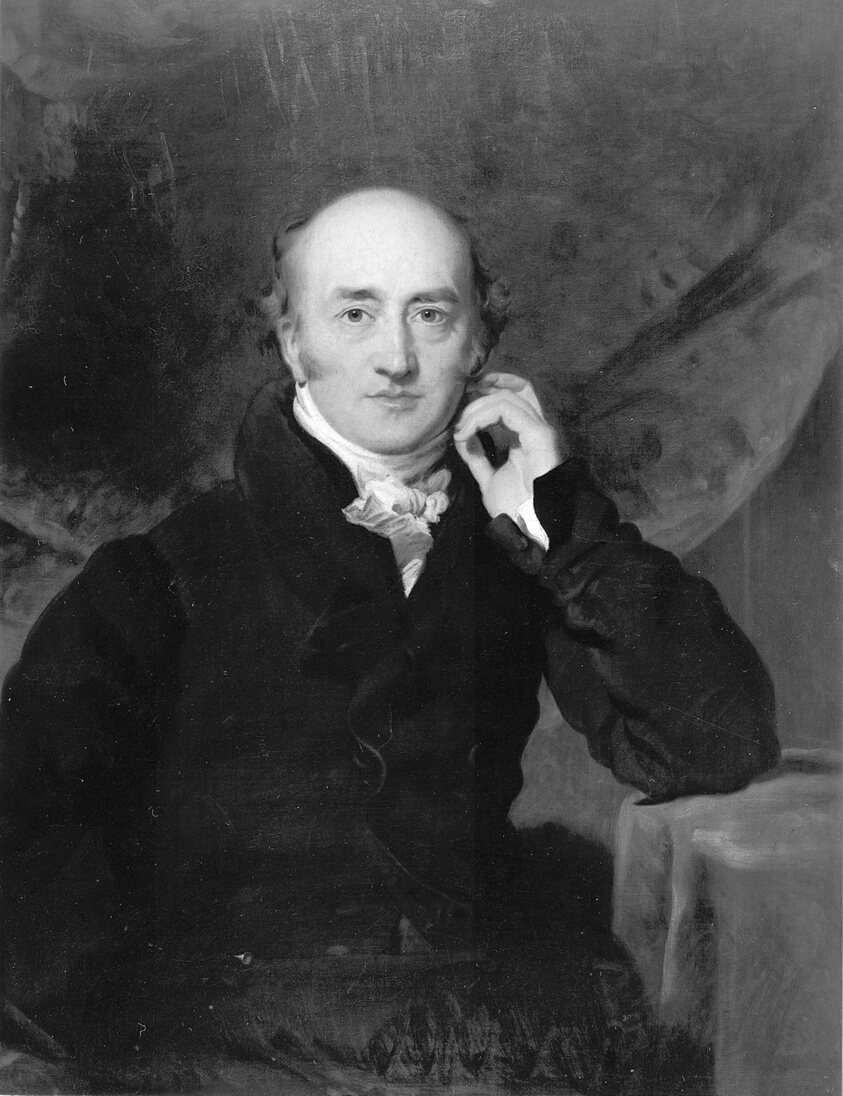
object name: Painting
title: Portrait of the Honorable George Canning, M.P.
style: nineteenth century, 19th century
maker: Sir Thomas Lawrence (English, 1769–1830)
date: c. 1822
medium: Oil on canvas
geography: England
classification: oil on canvas; paint; oil paintings (visual works); british; painting; european painting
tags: portraits: male subject, interior, man, portrait, portraits